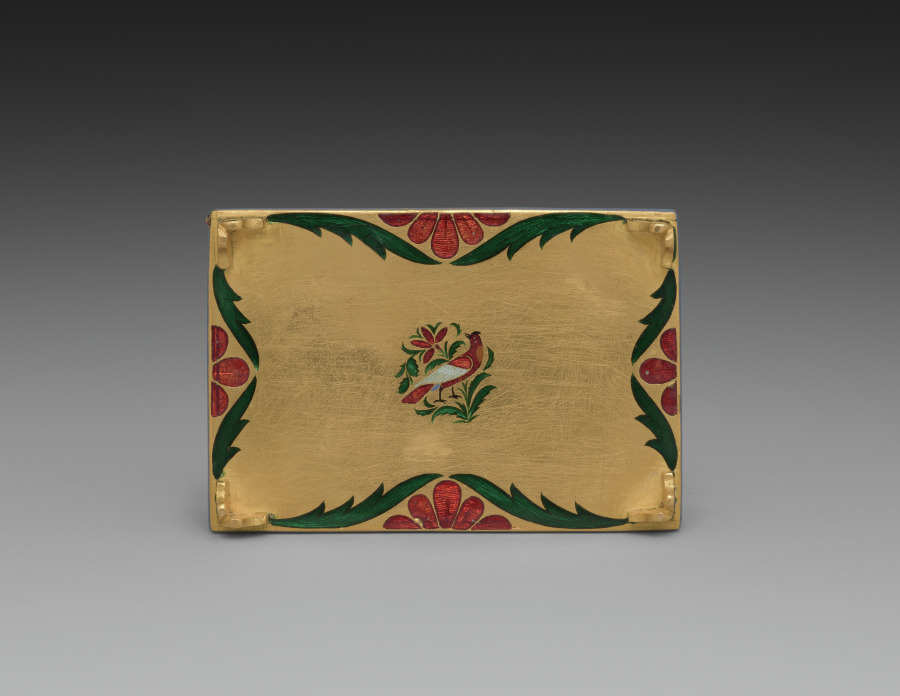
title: Box Decorated with Shiva, Vishnu, Krishna, and Ganesha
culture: Northwestern India, Rajasthan, Rajput Kingdom of Jaipur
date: c. 1800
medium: gold with enamel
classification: Metalwork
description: This box is covered in a variety of birds, animals, and plants. The central motifs on the lids include images of four Hindu gods: Shiva, Krishna, Vishnu, and Ganesha. The blue figures are Vishnu and Krishna, the latter of which is an incarnation of the former who is shown playing a flute. The elephant-headed Ganesha is red and accompanied by his mount, the bandicoot rat Dinka. The four-armed Shiva is paired with two animals, including a tiger and his sacred bull mount Nandi. Small enamel boxes could be used to house many different substances, from cosmetics to spices to stimulants, including opium and paan, a digestive typically given at formal gatherings as a sign of the host’s hospitality.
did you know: The sides have pairs of birds, while a single bird adorns the underside.